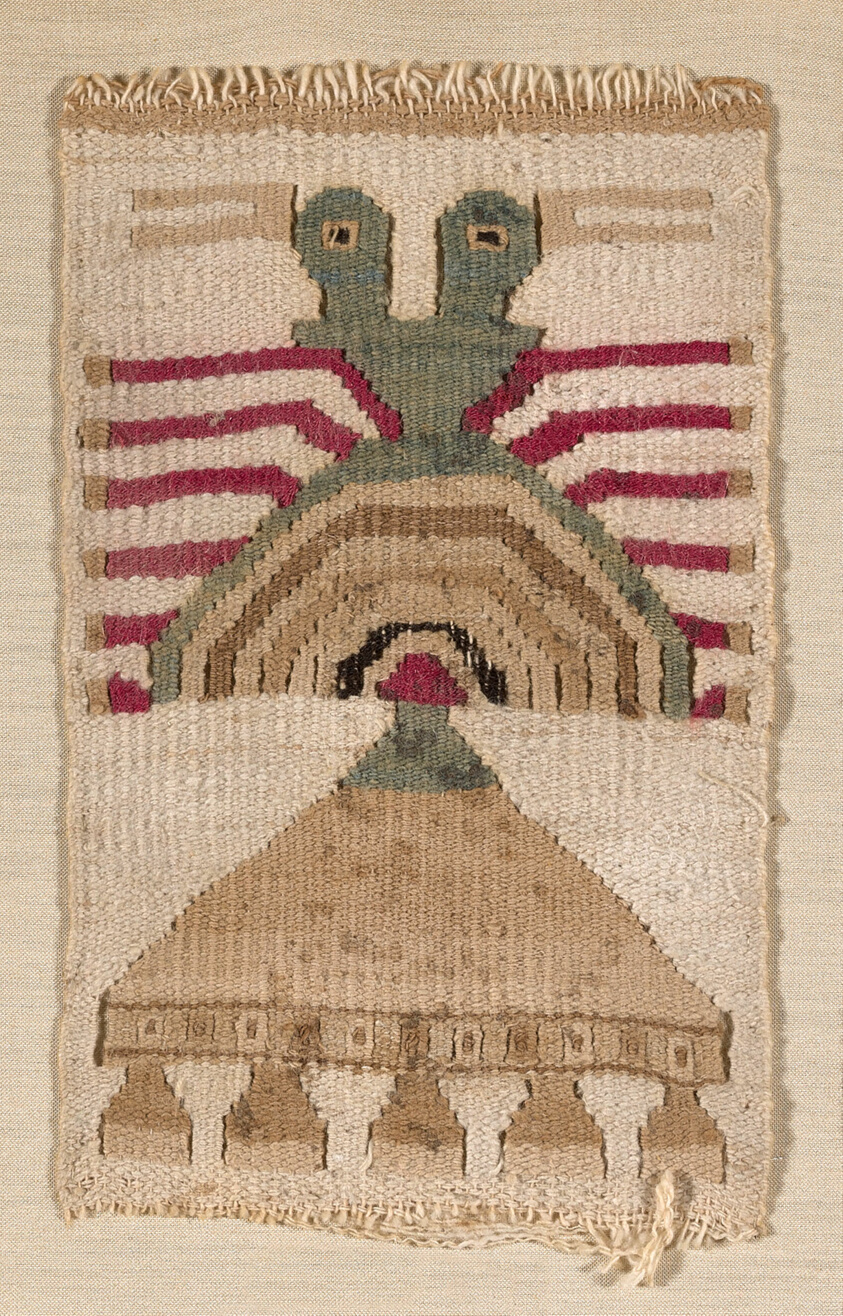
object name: Textile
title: Patch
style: lambayeque, Pre-Columbian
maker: Lambayeque (Peru, Probably north coast)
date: A.D. 1000/1476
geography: Peru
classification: textile; weaving